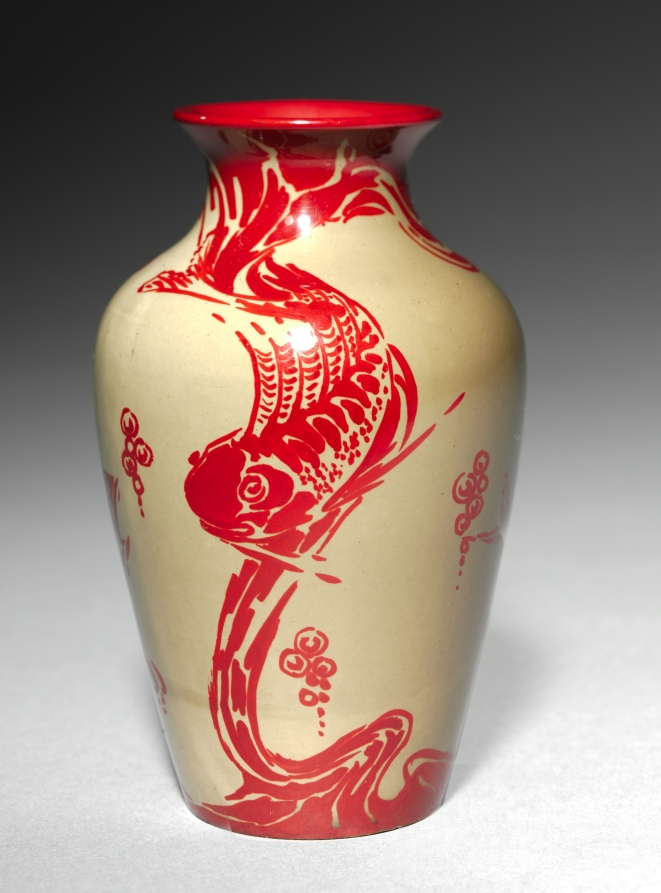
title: Vase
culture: England, 20th century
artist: Bernard Moore (British, 1850–1935)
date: c. 1900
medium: porcelain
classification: Ceramic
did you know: The designer Bernard Moore studied Asian and Islamic ceramics. He was especially interested in glazes like the vivid red one on this vase that resembles the color of oxblood.